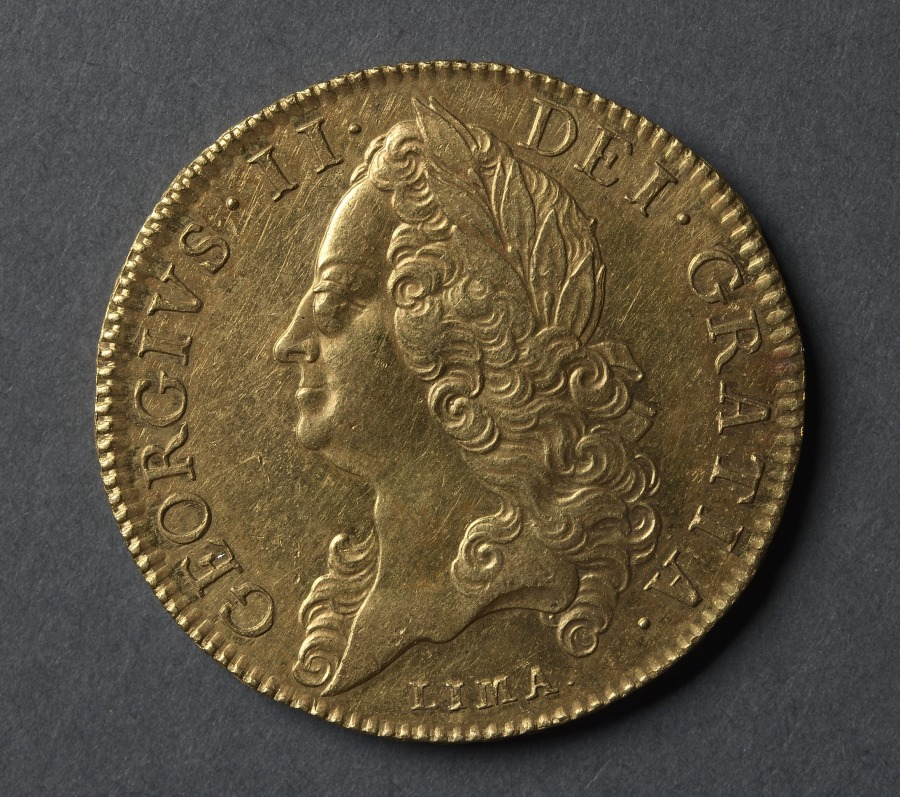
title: Five Guineas: George II (obverse); Shield of Arms (reverse)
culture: England, George II, 1727-1760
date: 1746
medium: gold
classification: Coins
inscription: DEI . GRATIA . GEORGIVS . II; below: LIMA.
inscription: M·B·F·ET·H·REX·F·D·B·ET·L·D·S·R·I·A·T·ET·E·17 46·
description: A new bust now appears on the coinage showing the king as an older man. The word LIMA that appears below the bust on this year only, refers to bullion captured by Admiral Anson from a Spanish plate fleet at Manila during his circumnavigation of the globe (1739–43). It also probably includes bullion supplied by a number of privateers operating against the Spanish plate fleets in the Atlantic. Why the actual word "Lima" was chosen to mark this supply of bullion has never been satisfactorily explained. The mint record book of the period simply records a warrant being issued for the inclusion of the word.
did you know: The crowned quartered shield of arms represents from right to left, top to bottom, a framed lion for Scotland, France with fleurs de lys, Ireland with harp, and two lions for Brunswick, among others.